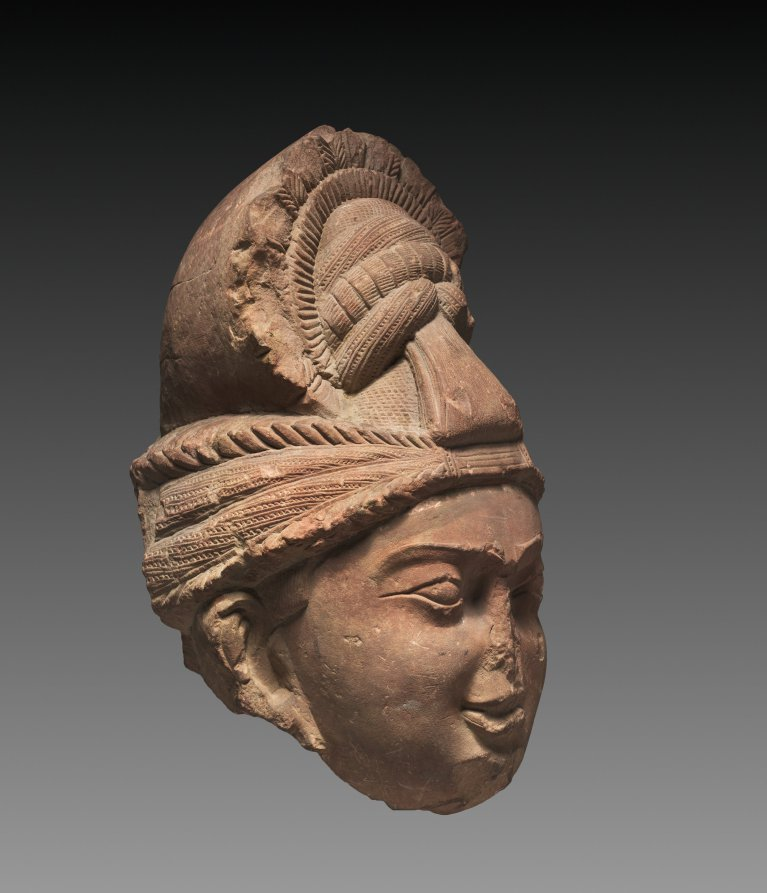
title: Head of a Bodhisattva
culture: India, Mathura, Kushan period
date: 75–early 100s CE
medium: red sandstone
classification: Sculpture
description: This monumental male head must have originally belonged to a larger-than-life Bodhisattva image. The imposing turban is of the type worn by royalty, divinities, and nobility during the Kushan period from the first through third century. The round, fleshy face, heightened by a subtle smile, retains the powerful quality of early Kushan and pre-Kushan images of nature divinities, known as yakshas.